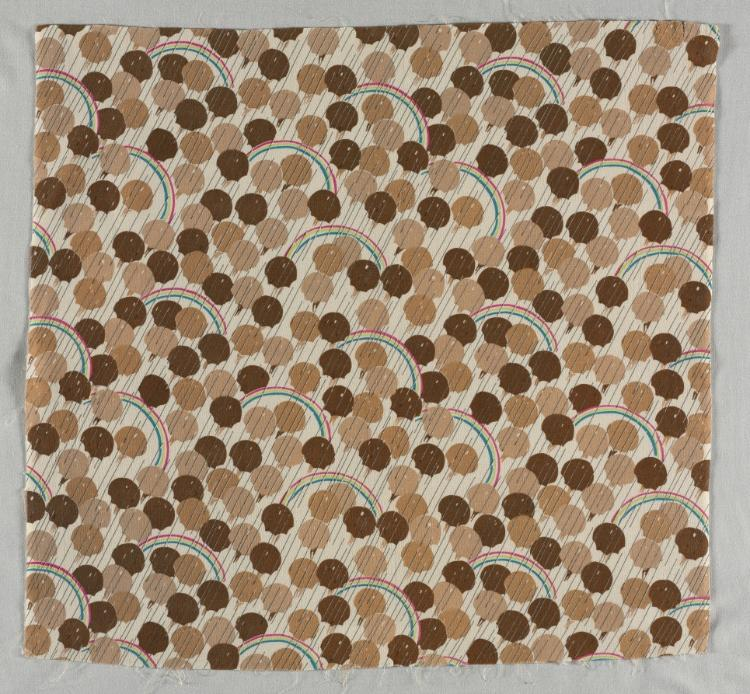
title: April (No. 706)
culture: America, New York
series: Americana Prints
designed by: Clayton Knight (American, 1891–1969)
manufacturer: Stehli Silks Corporation (United States; Pennsylvania, Lancaster; and New York, New York, 1840–c. 1955)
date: 1927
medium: silk: plain weave, roller printed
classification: Textile